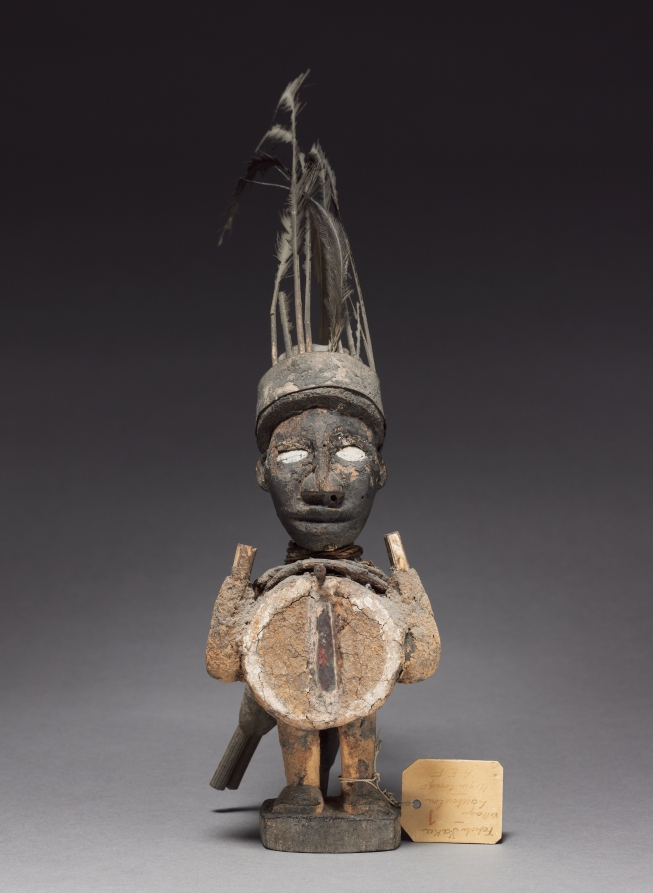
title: Power figure (nkisi)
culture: Africa, Central Africa, Republic of the Congo, Kongo-style maker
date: late 1800s-early 1900s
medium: Wood, metalized glass, organic materials (including resin), feathers, plant fibers, iron, and copper alloy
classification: Sculpture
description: One of seven minkisi figures previously in the René and Odette Delenne collection, this object contained medicines in which an ancestral spirit was believed to reside. This figure is one of the two tallest in the collection. Feathers of a bird of prey adorn its head, with two small guns pointing upward and a third hanging down. It had belonged to “the sorcerer of Louboulou.”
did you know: This is one of two tallest in the collection of spiritual figurines loaded with gunpowder to shoot at witches: nduda, or “night guns.”